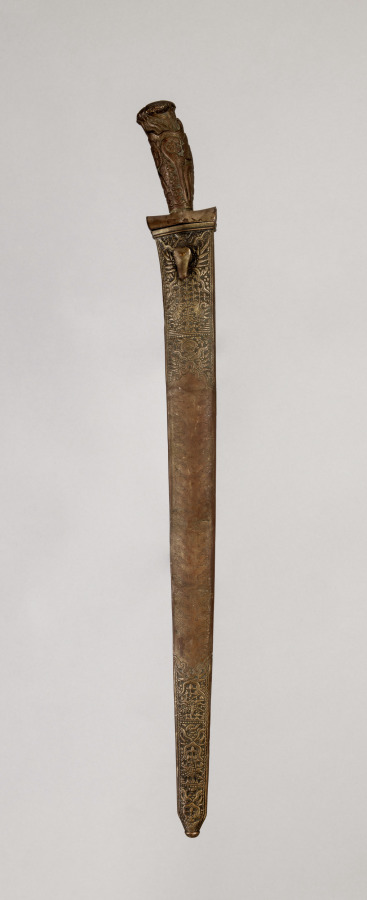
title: Sword and Scabbard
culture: Java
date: 1800s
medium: iron and silver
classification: Arms and Armor